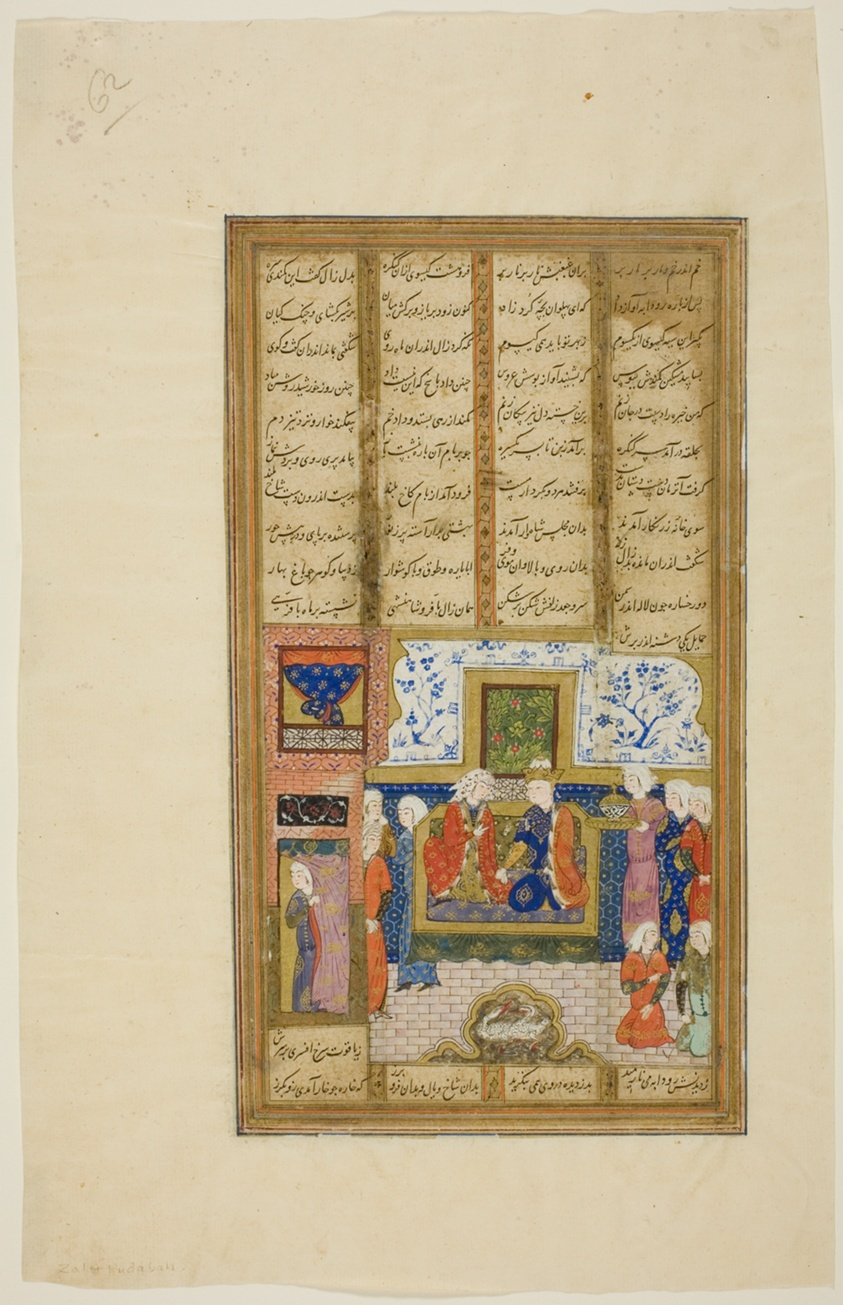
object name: Painting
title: Zal and Rudaba in a Palace, page from a copy of the Shahnama of Firdausi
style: Islamic (culture or style)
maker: Iran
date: Timurid dynasty (ca. 1370–1507), 1480/90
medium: Opaque watercolors and ink on paper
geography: Iran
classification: miniature painting; painting; asian art